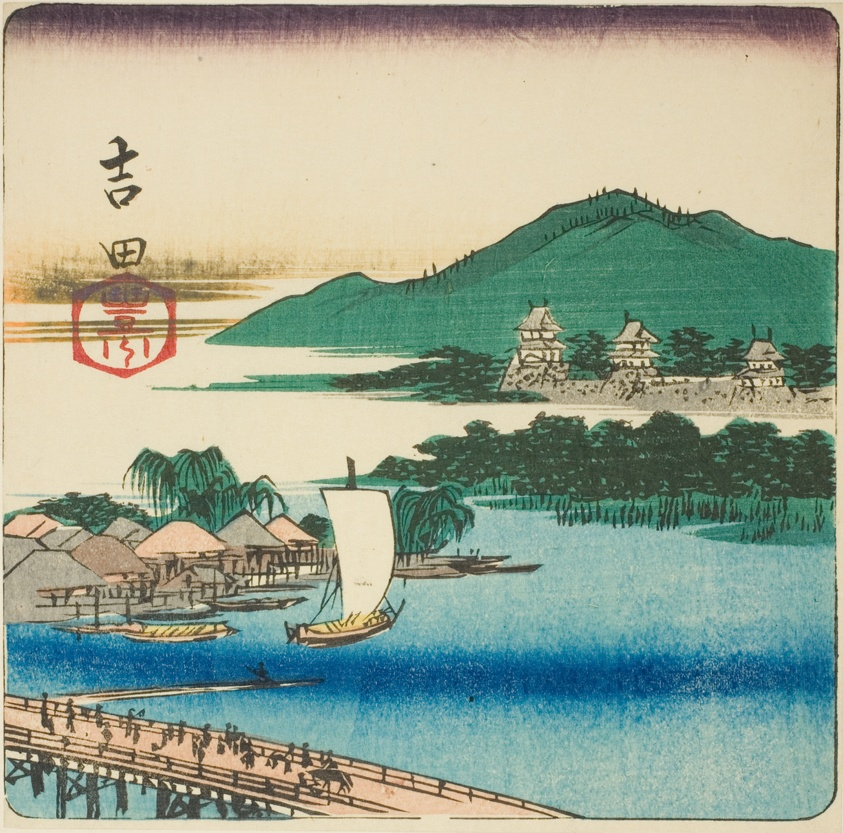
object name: Print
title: Toyo River at Yoshida (Yoshida, Toyokawa), section of a sheet from the series "Cutouts of the Fifty-three Stations (Gojusan tsugi harimaze)"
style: Japanese (culture or style)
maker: Utagawa Hiroshige 歌川 広重; Japanese, 1797-1858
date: 1852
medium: Color woodblock print; section of harimaze sheet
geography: Japan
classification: woodblock print; print; asian art